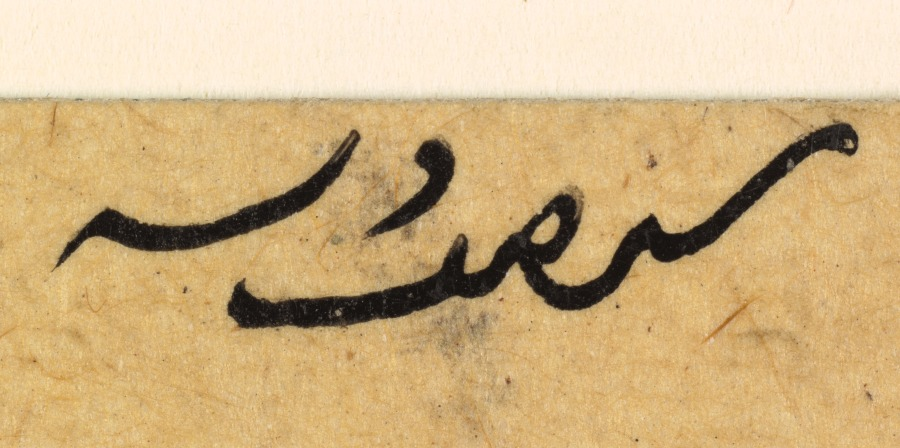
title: A prince conversing with a woman while taking refreshments on a terrace (recto)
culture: Mughal India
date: c. 1710–20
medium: Gum tempera, ink, and gold on paper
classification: Painting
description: The carpet turns a terrace into a space where a prince can enjoy the company of women over wine and fruits. A covered box on the carpet contains aromatic betel nut packets for pleasurable chewing. He has removed his shoes, which are left on the marble step. A princess pours liquor from a golden bottle into a tiny blue-and-white ceramic cup. The pair’s royal status is indicated by the attendants who hold the white cloth and peacock-feather whisks. Two other women bring jewels and a vial of perfume to be inspected and discussed by the royal connoisseurs.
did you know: The prince removed his shoes before joining the picnic on the carpeted terrace.